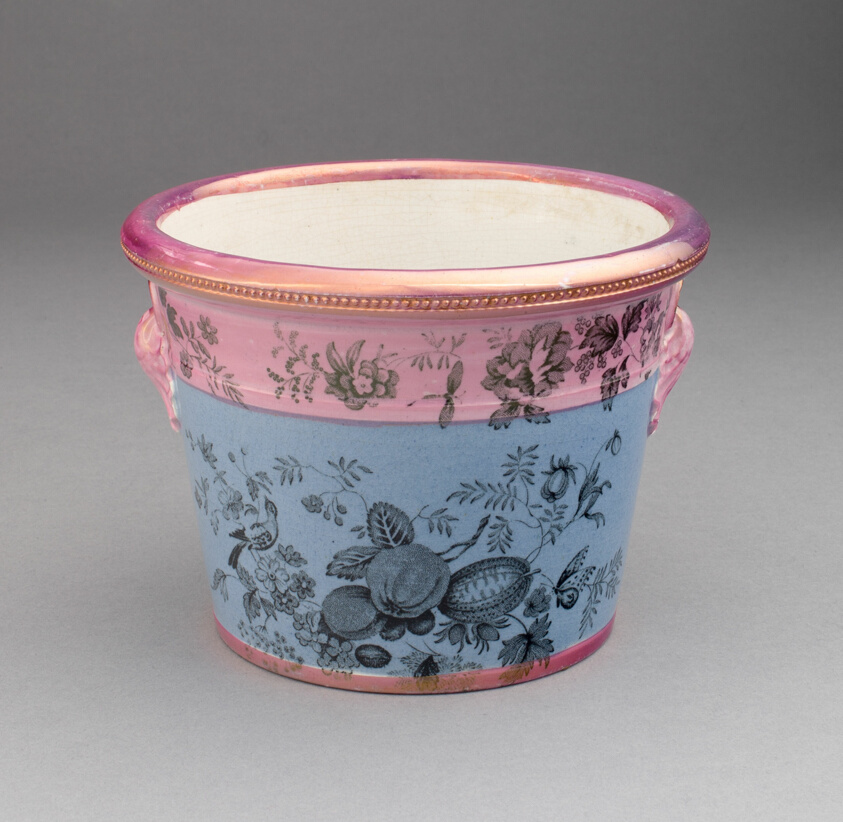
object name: Ceramics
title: Flower Pot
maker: England, Staffordshire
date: 1810-20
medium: Lead-glazed earthenware with lustre decoration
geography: Staffordshire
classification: earthenware; european decorative arts; ceramics